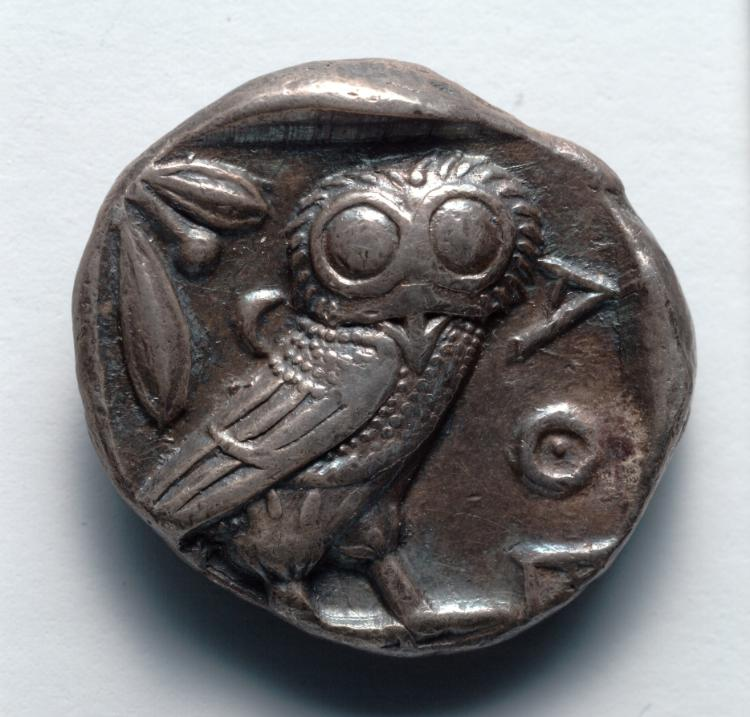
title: Tetradrachm: Owl, Crescent Moon, Olive Branch (reverse)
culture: Greek, minted at Athens (Attica)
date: 480–449 BCE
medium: silver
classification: Coins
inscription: ΑΘΕ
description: Incorporating the first three letters of the city name—ΑΘΕ—with then-iconic images of the patron goddess Athena and her owl, the Athenian tetradrachm was among the most widely traded and most recognizable coins of the ancient world. The olive leaves on Athena’s helmet and the small crescent moon behind the owl date this coin after the Persian Wars.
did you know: The three letters—ΑΘΕ—mark this as an Athenian coin.